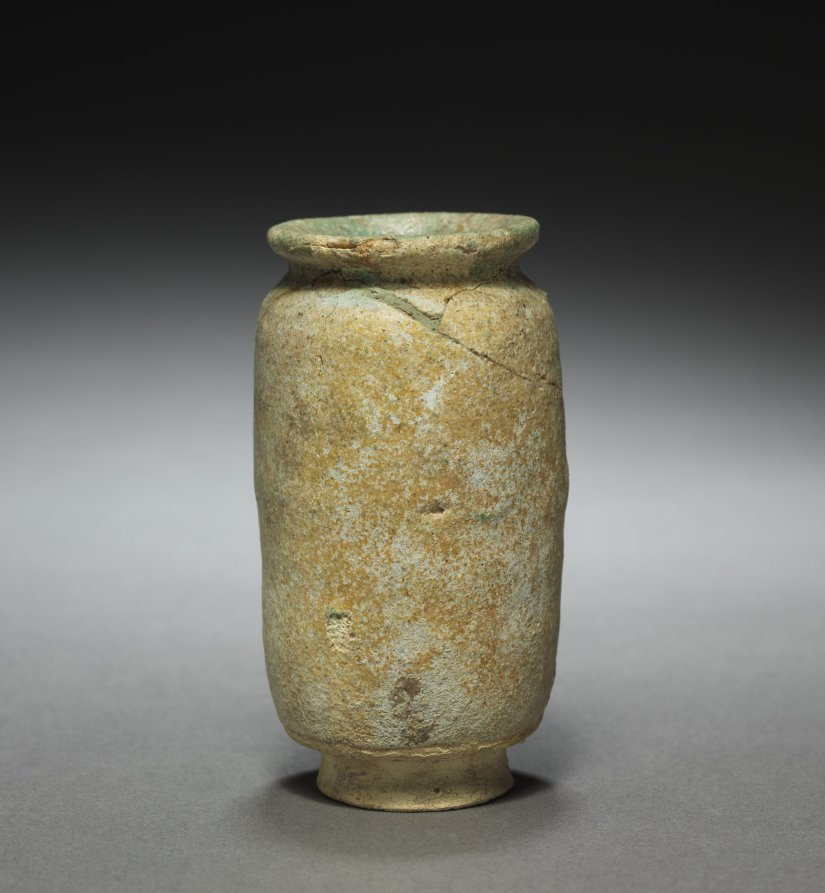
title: Bottle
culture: Parthian Empire (247 BCE–224 CE)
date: 1–200 CE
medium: earthenware with weathered glaze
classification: Ceramic